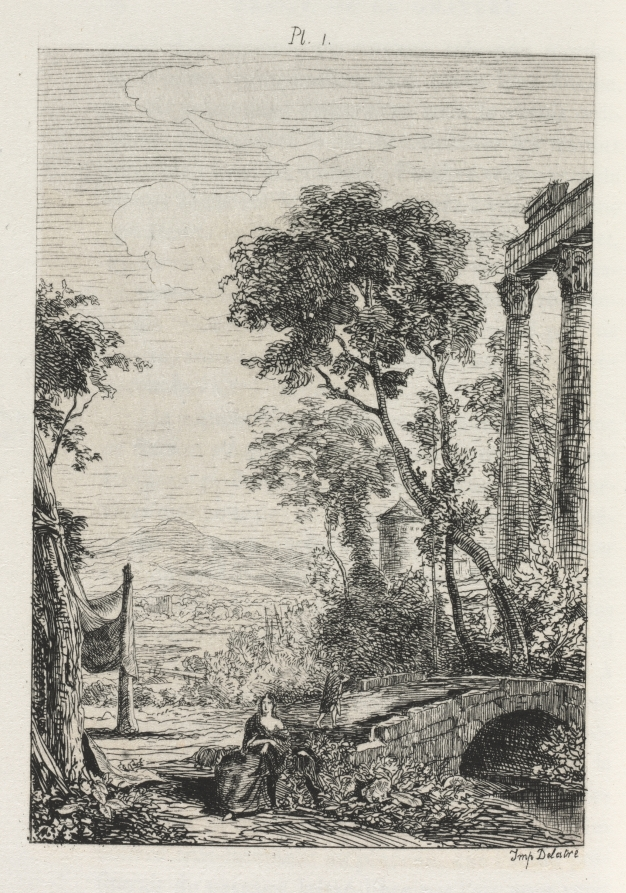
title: Traité de La Gravure a l’eau forte: Plate 1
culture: France, 19th century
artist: Maxime Lalanne (French, 1827–1886)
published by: Cadar and Luquet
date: 1866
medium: etching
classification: Bound Volume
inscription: on first page, in pencil: "J. H. Maghee 1874"